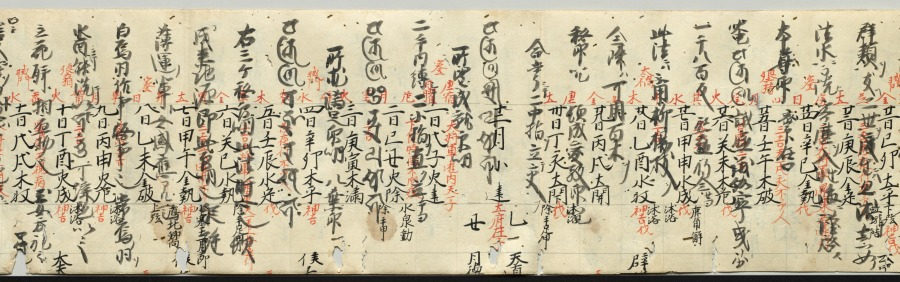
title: Scroll of Miscellaneous Notes written on a Calendar by Priest Seigen (verso)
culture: Japan, Kamakura period (1185–1333)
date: c. 1200–1231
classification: Manuscript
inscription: bears miscellaneous notes written by Priest Seigen.